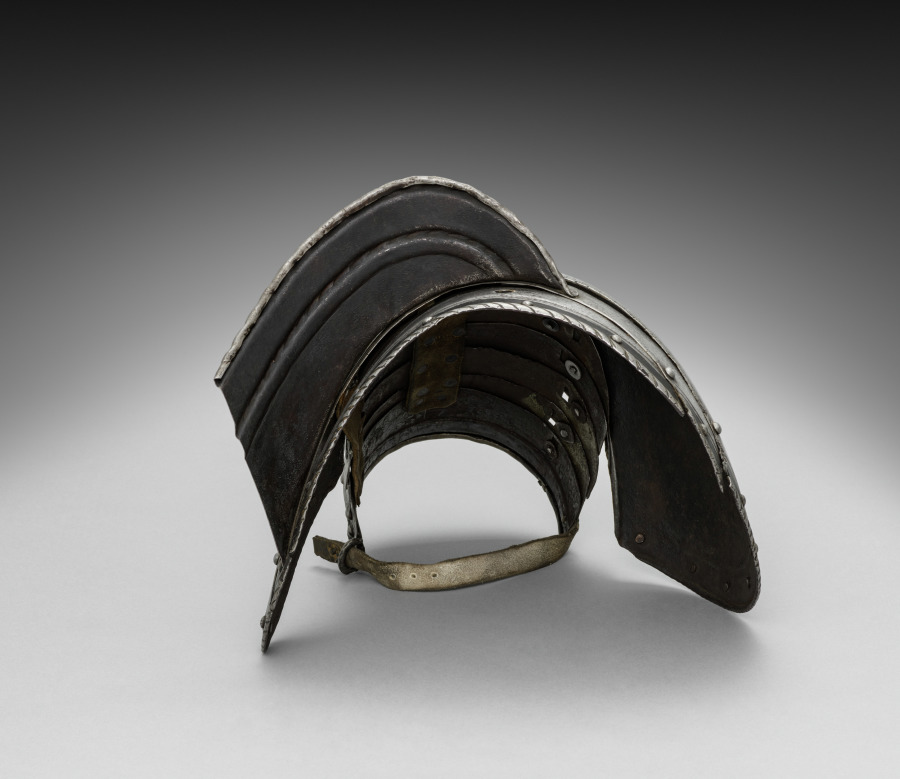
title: Right Pauldron with Guard Brace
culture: Germany, 19th century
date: 1801–1900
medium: steel with black paint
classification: Arms and Armor